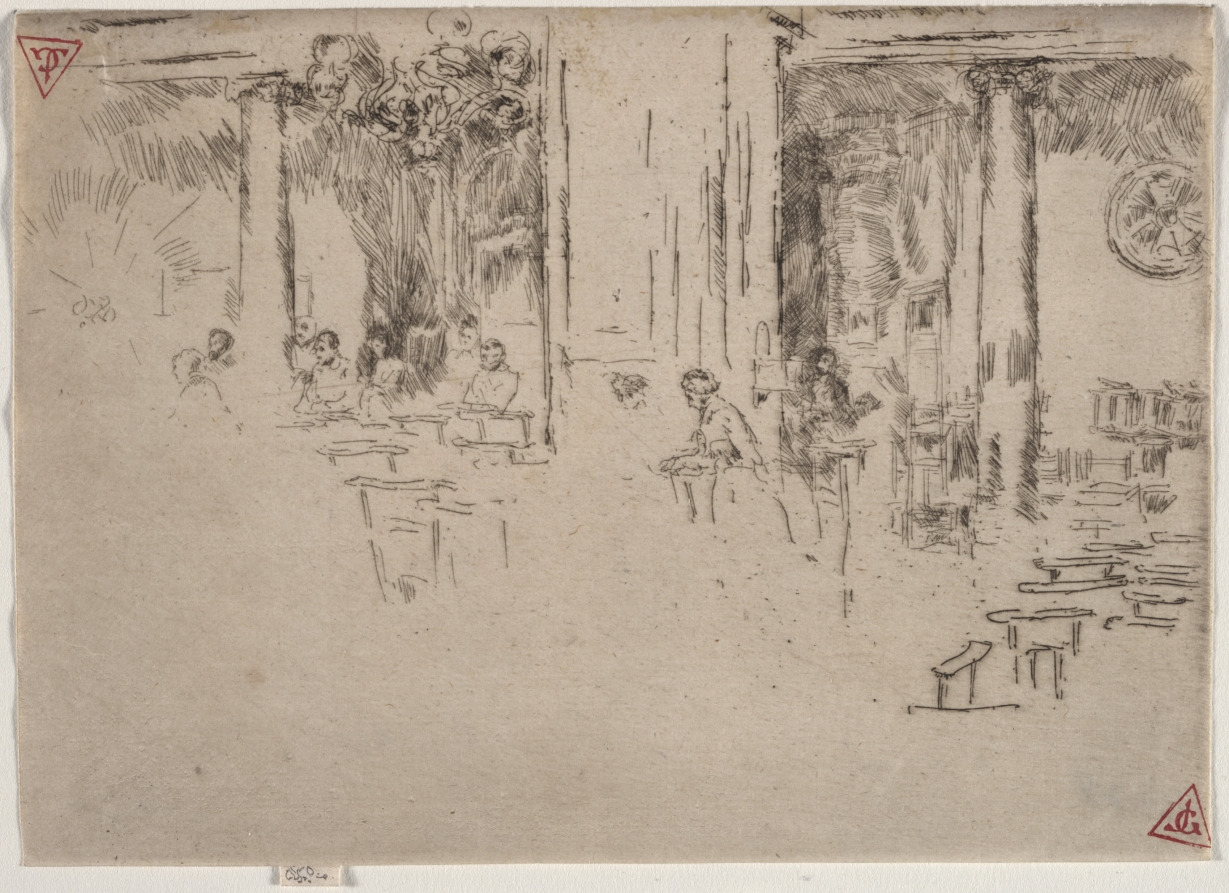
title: Church, Brussels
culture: America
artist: James McNeill Whistler (American, 1834–1903)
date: 1887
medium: etching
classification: Print